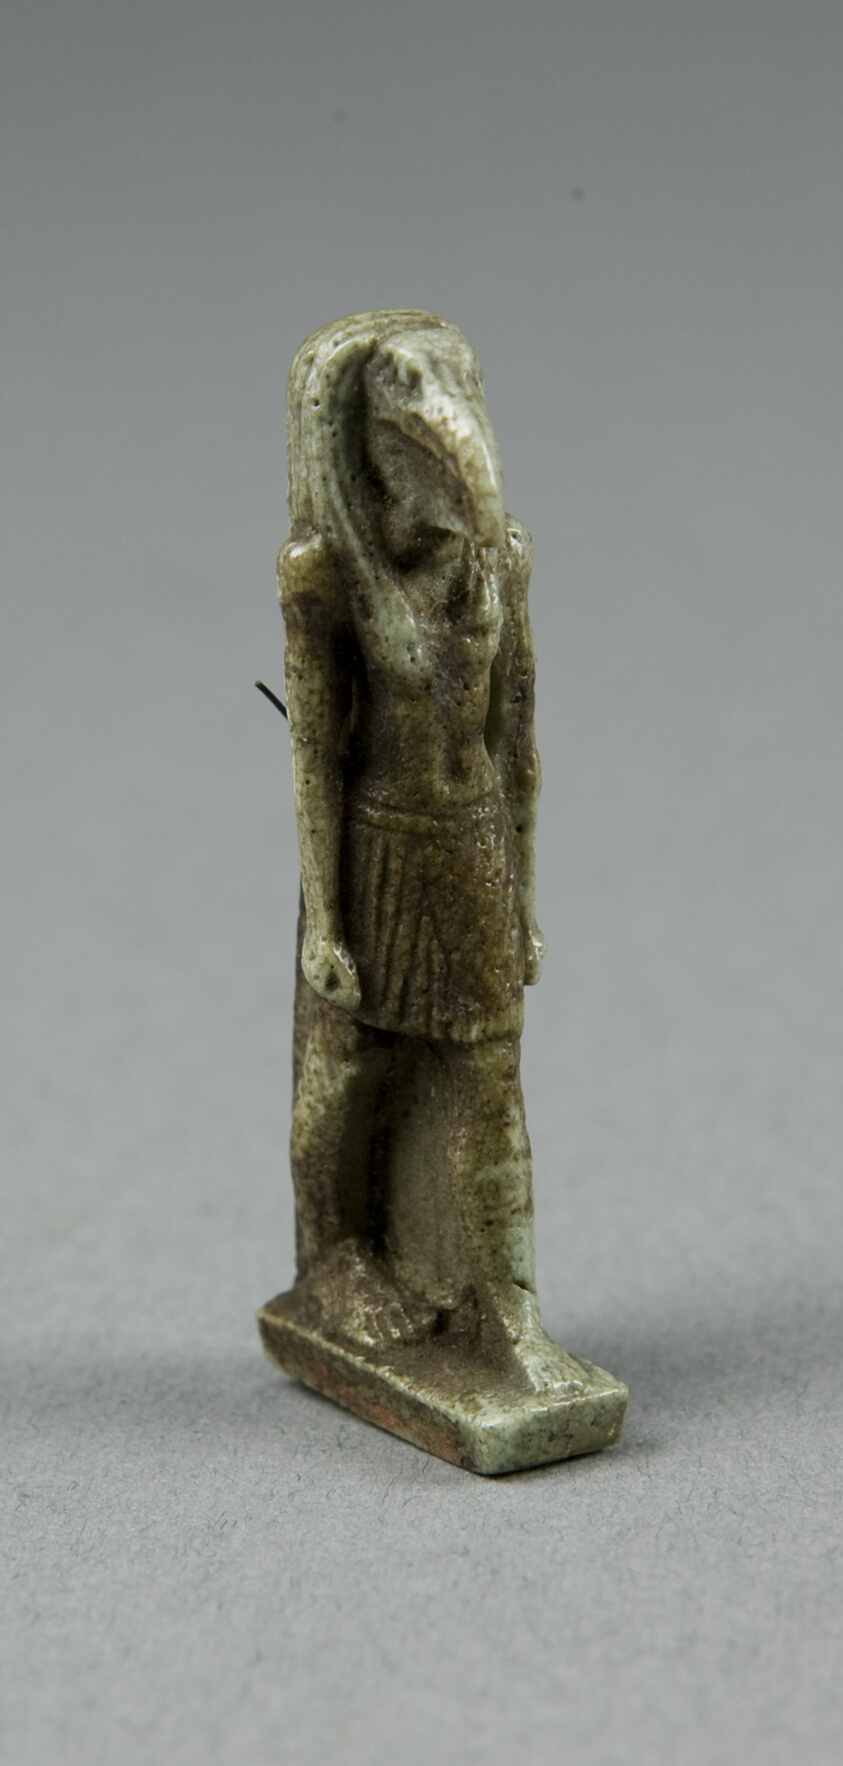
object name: Costume and Accessories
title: Amulet of the God Thoth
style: third intermediate period, egyptian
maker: Egyptian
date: Third Intermediate Period, Dynasty 21–25 (1070–656 BCE)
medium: Faience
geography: Egypt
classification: amulet; jewelry; ceramics; ancient art; costume; faïence (composite material)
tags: gods (deities)